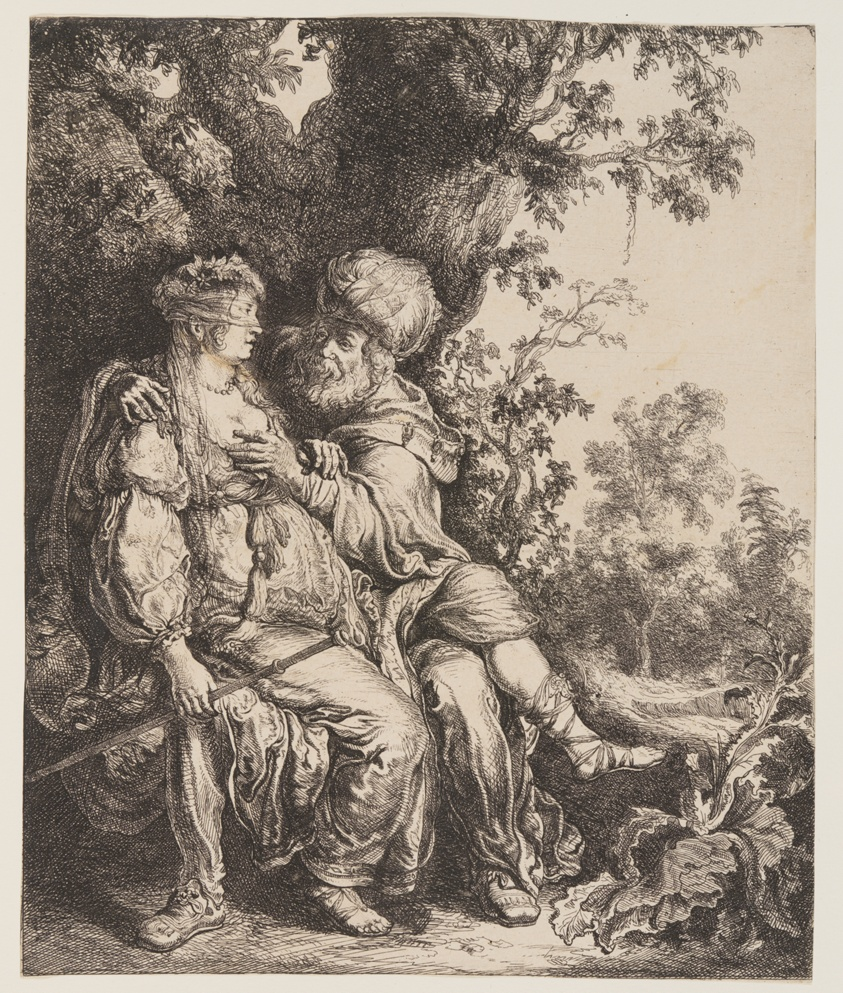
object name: Print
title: Judah and Tamar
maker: Pieter Lastman (Dutch, 1583–1633)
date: c. 1620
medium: Etching on ivory laid paper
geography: Netherlands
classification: print; paper; prints and drawing; etching